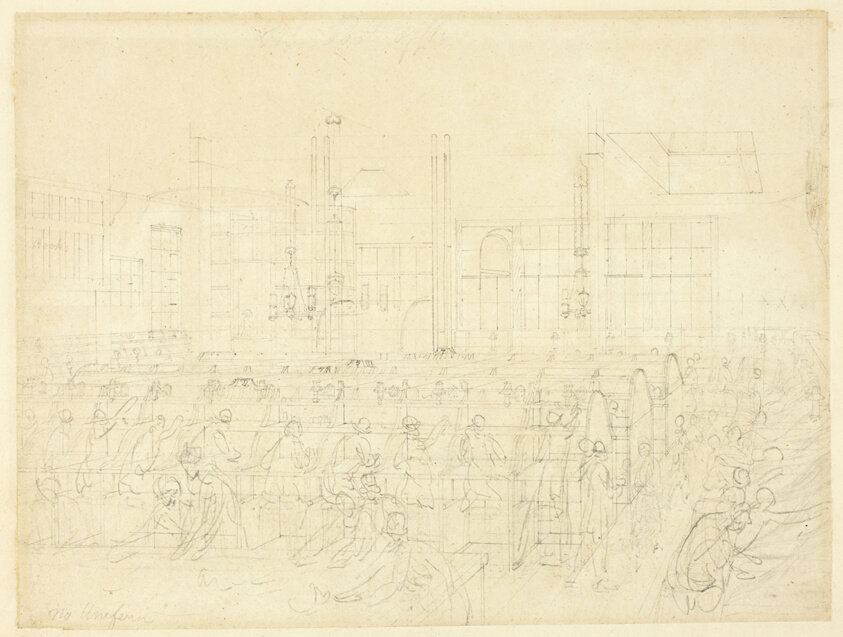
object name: Drawing and Watercolor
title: Study for The Post Office, from Microcosm of London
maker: Augustus Charles Pugin (English, born France, 1762-1832); Thomas Rowlandson (English, 1756-1827)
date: c. 1809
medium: Graphite on cream wove paper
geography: England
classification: graphite; drawings (visual works); prints and drawing